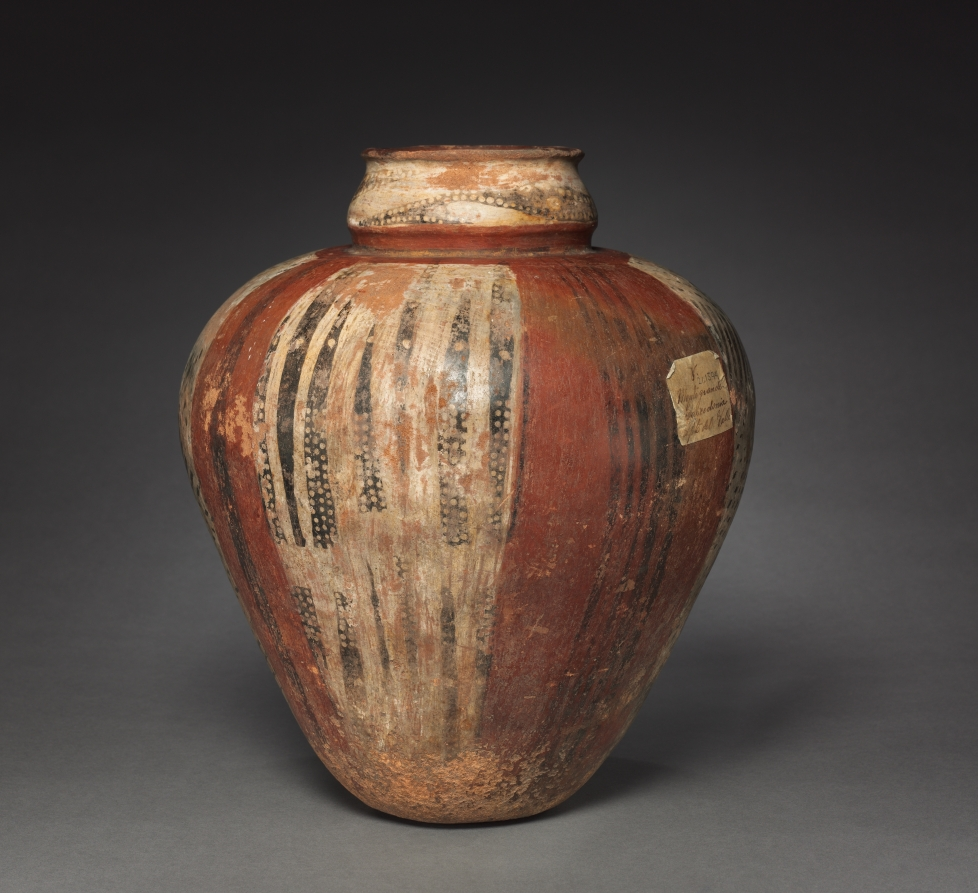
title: Jar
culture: Colombia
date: before 1550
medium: pottery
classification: Ceramic